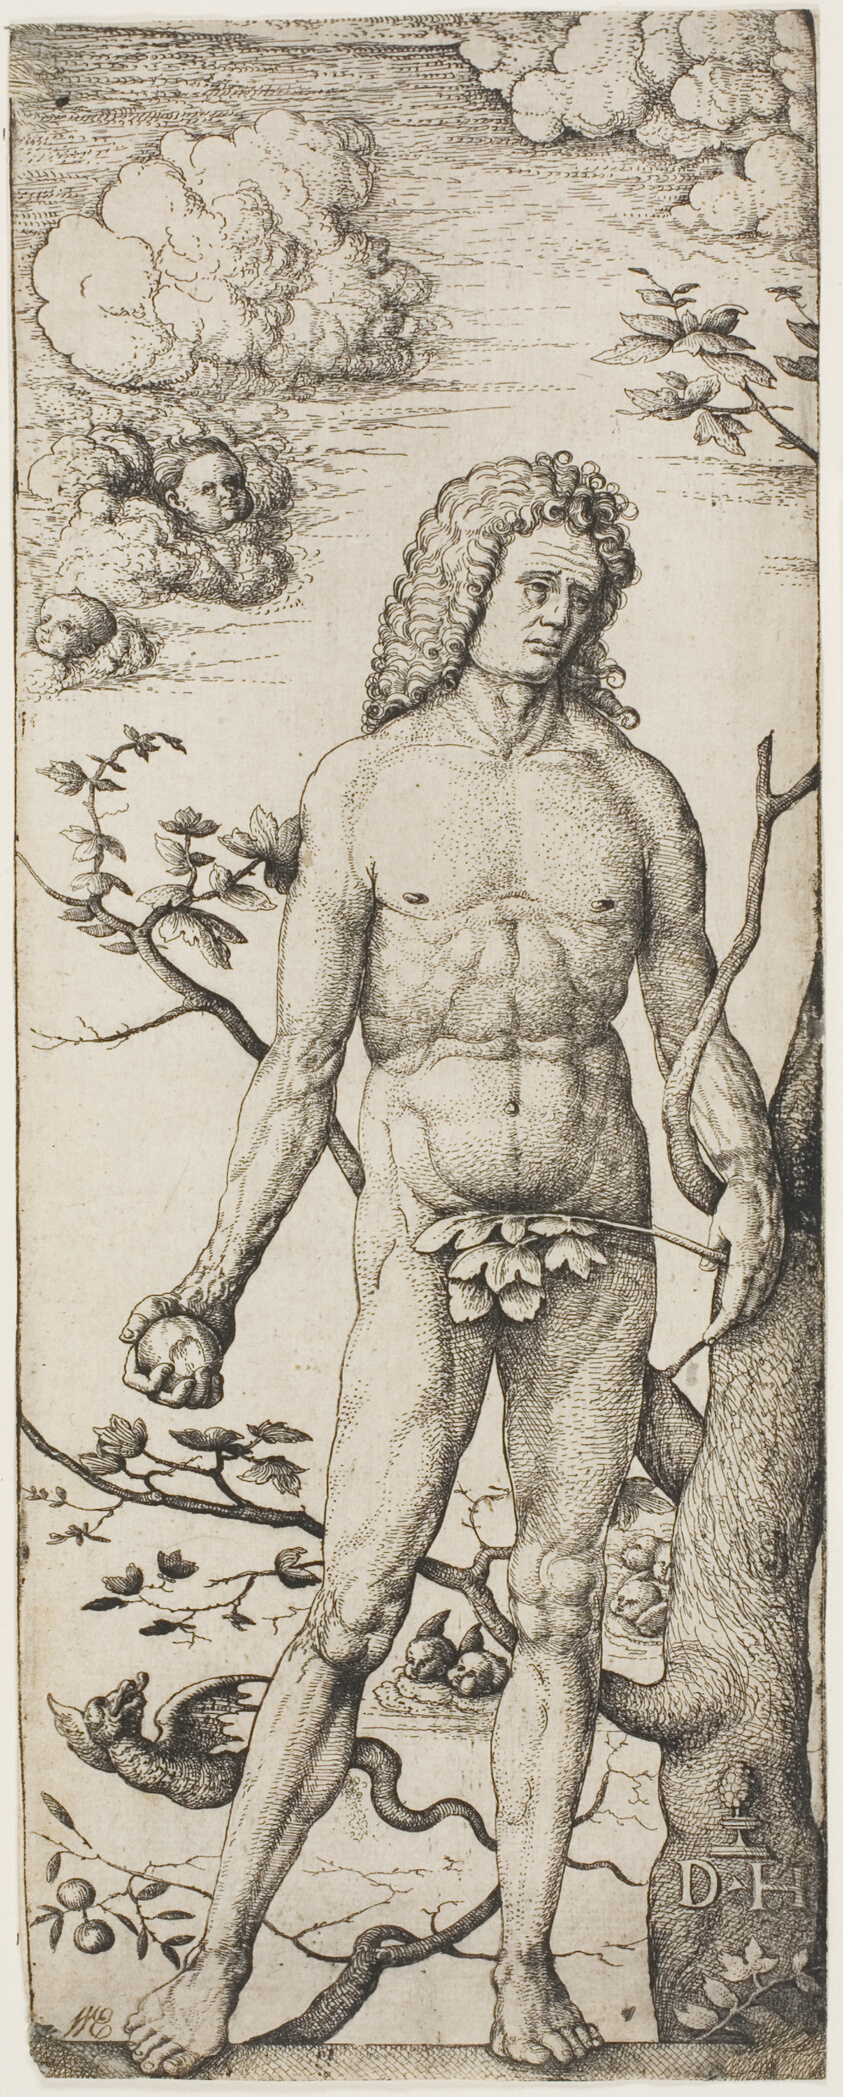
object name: Print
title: Adam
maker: Daniel Hopfer, I (German, 1470-1536)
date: by 1522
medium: Etching in black on cream laid paper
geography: Germany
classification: etching; print; prints and drawing